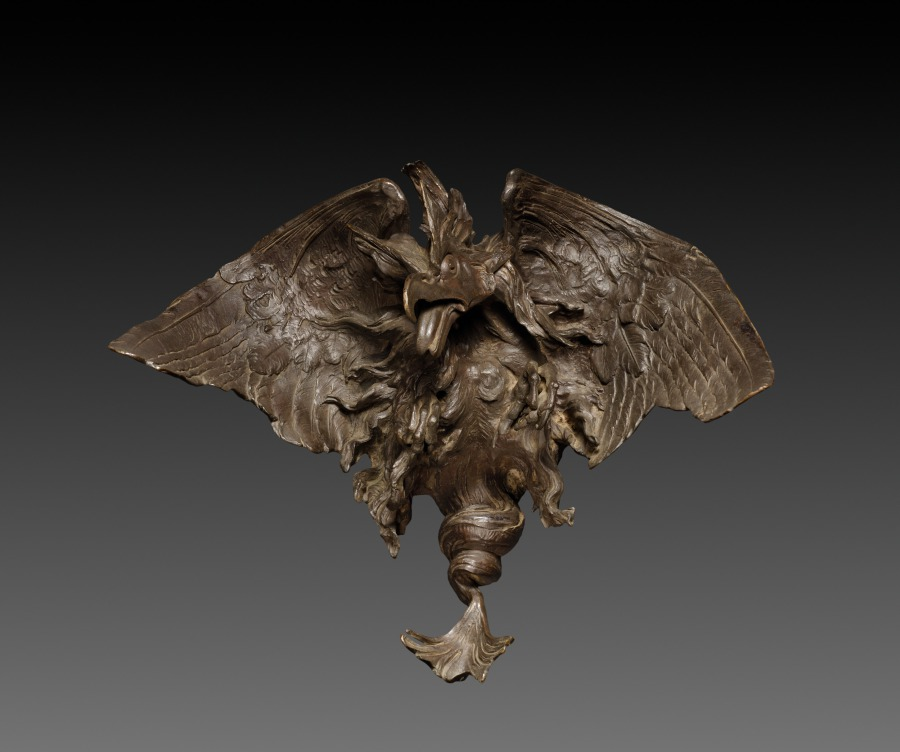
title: Wild Basilisk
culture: Germany, 19th century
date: 1800s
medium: bronze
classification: Sculpture